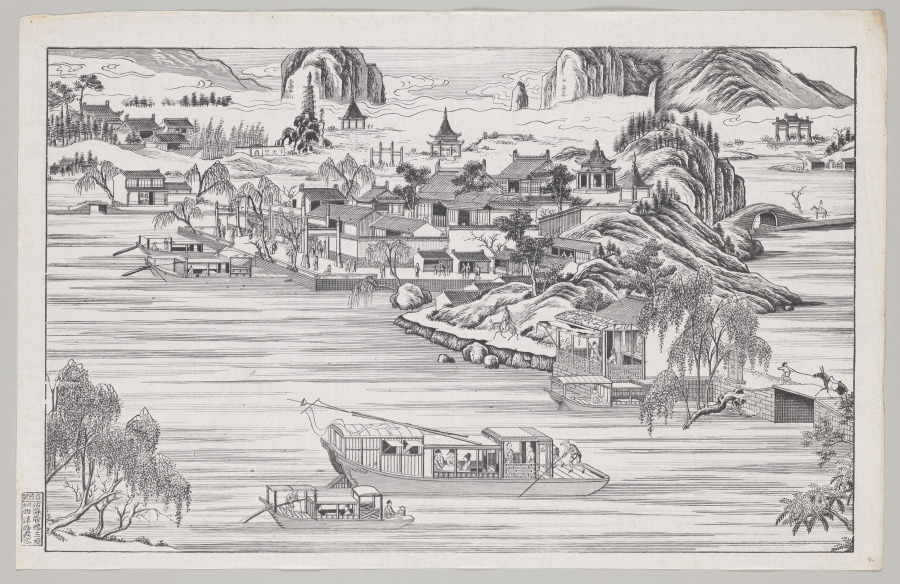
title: Westlake Panorama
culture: China, Qing dynasty (1644–1911), Qianlong reign (1736–95)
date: mid-1700s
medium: One of four woodblock prints; ink on paper; printed with three woodblocks in shades of black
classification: Print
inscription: 信德號 姑蘇管瑞玉頂細西洋畫發客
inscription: The 10 scenes on the four prints are identified by their titles: Print one: 1. Remnant Snow on Broken Bridge (Duanqiao canxue, 斷橋殘雪), 2. Lotus Breeze at Qu Winery (Quyuan fenghe, 曲院風河 [sic]). Print two: 3. Autumn Moon over Placid Lake (Pinghu qiuyue, 平湖秋月), 4. Twin Peaks Piercing the Clouds (Liangfeng chayun, 兩峰插云), 5. Spring Dawn at Su Dike (Sudi chunxiao, 蘇 堤春曉), 11. The emperor’s temporary palace (xinggong, 行宮). Print three: 6. Listening to the Orioles by the Willow Ripples (Liulang wenying, 柳浪 聞鶯), 7. Three Stupas and the Reflecting Moon (Santan yinyue, 三潭印月). Print four: 8. Watching Fish at Flower Cove (Huagang guanyu, 花港觀魚), 9. Sunset at Leifeng Pagoda (Leifeng xizhao, 雷峰夕照). 10. Evening Bell from Nanping Hill (Nanping wanzhong, 南屏晚鍾.) In print two, 11. the emperor’s temporary palace (xinggong 行宮) is also identified.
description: Revived by the southern imperial inspection tours, West Lake imagery became a popular subject during the early Qing dynasty. This panorama is composed of four prints, showing the Ten Scenes of the West Lake in Hangzhou along with other sights. The vanishing point perspective and the hatching lines that depict shading, water, or sky derive from European copperplate prints, introduced by missionaries to China, and were celebrated novelties in 18th-century Suzhou prints. These prints also reached Europe to furnish 18th-century palace interiors.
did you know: Woodblock printing in color reached a height in China in the 1600s to 1700s. The prints were executed by means of sets of separate blocks, each carved to print a different color.